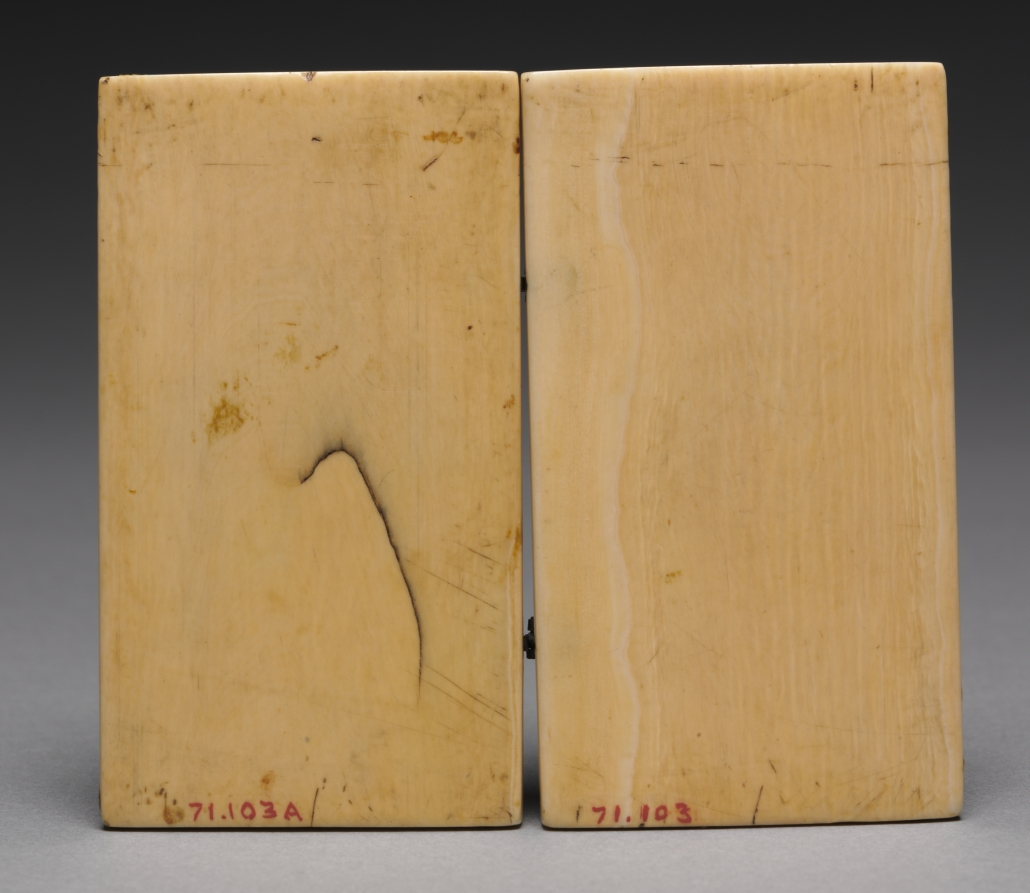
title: Diptych with Scenes from the Life of Saint Martin of Tours: The Consecration of Saint Martin as Bishop (left); Saint Martin Shares his Cloak with a Beggar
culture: Germany, Cologne, 14th century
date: 1340–1350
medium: ivory with polychromy and gilding, original silver hinges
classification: Ivory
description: This beautiful and well-preserved diptych includes its original polychromy, gilding, and silver hinges, though these are no longer connected. With its lapis background, red roof tiles, and gilded details of the figures’ clothing, the appearance is one of luxuriousness. The diptych provides us with a rare and vivid impression of how such devotional ivories were originally decorated in the 1300s.